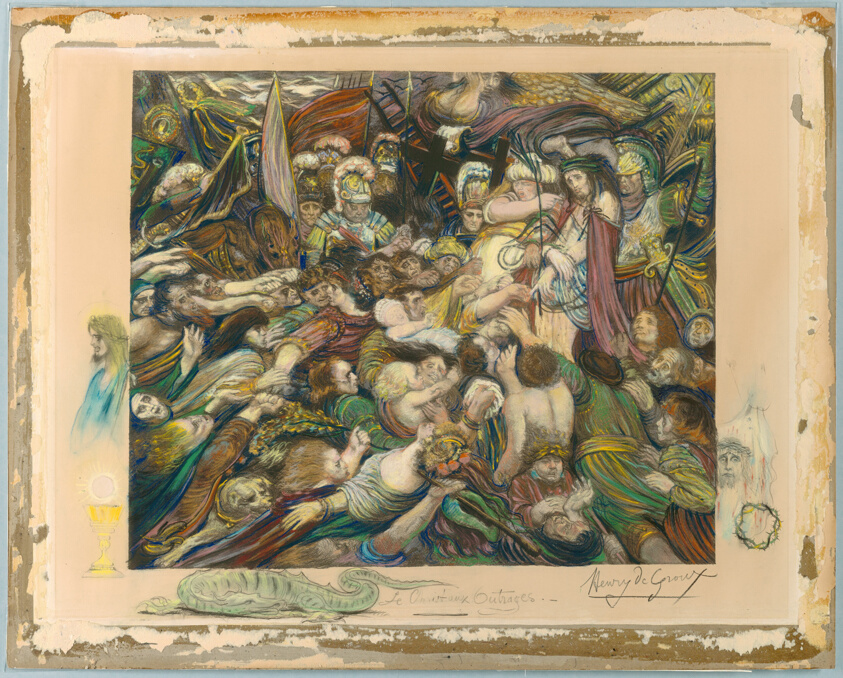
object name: Drawing and Watercolor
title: Christ Among His Tormentors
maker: Henri de Groux (Belgian, 1867-1930)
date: 1894–98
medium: Pastel over lithograph in black ink with additions in crayon and graphite on cream wove Canson & Montgolfier paper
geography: Belgium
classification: pastel; drawings (visual works); prints and drawing